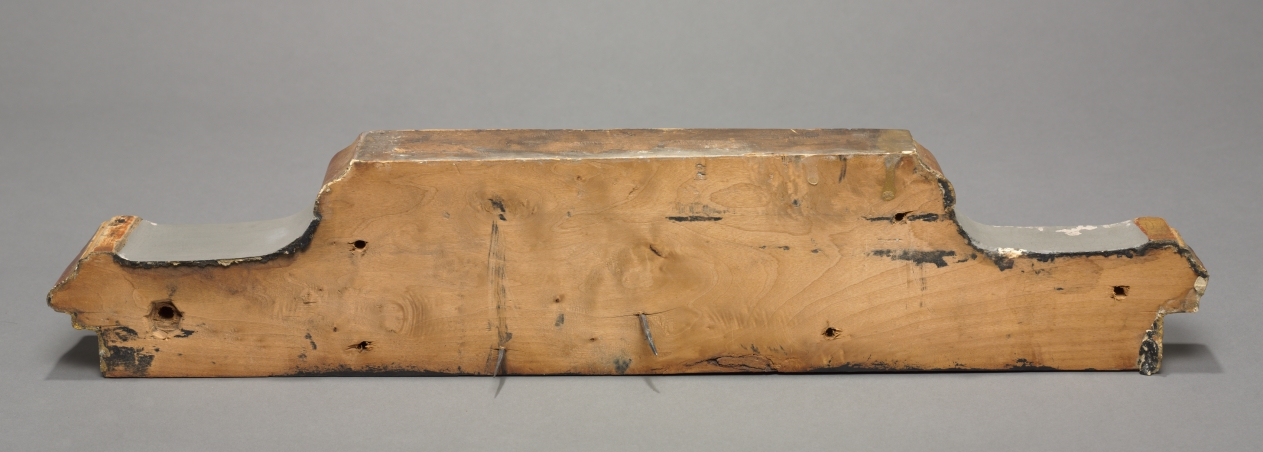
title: Pedestal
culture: Italy, Rome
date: mid-1700s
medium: carved, gilded, and painted wood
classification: Furniture and woodwork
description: The coat of arms on this pedestal is that of Cardinal York, the last of the Stuart pretenders to the British throne. He lived out his years in Rome, where he had been made a cardinal of the Church.